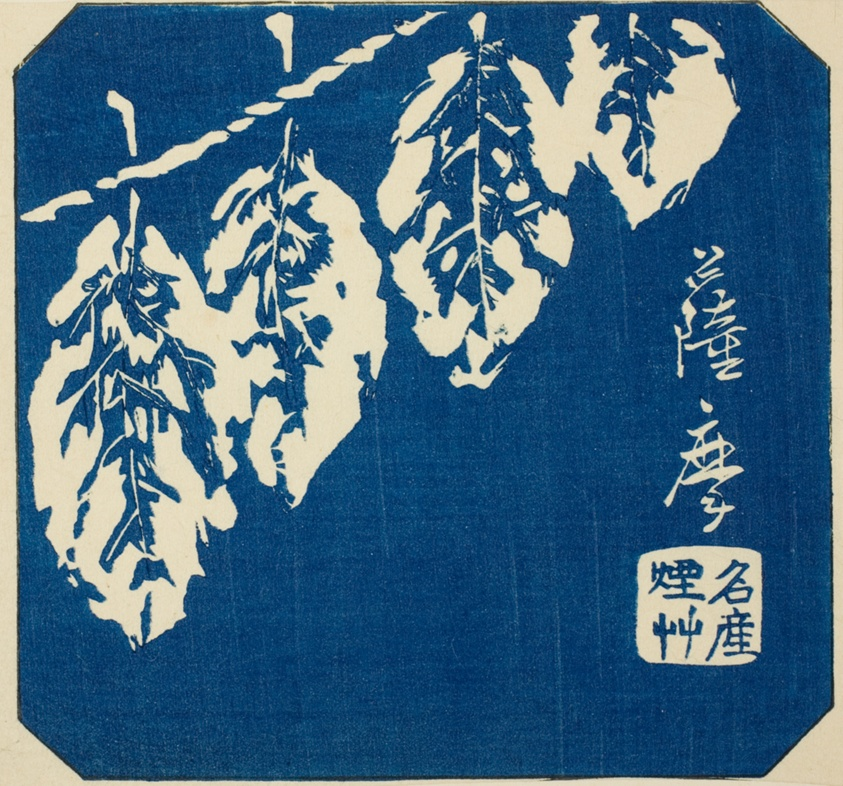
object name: Print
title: Satsuma, section of sheet no. 18 from the series "Cutout Pictures of the Provinces (Kunizukushi harimaze zue)"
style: Japanese (culture or style)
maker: Utagawa Hiroshige 歌川 広重; Japanese, 1797-1858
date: 1852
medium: Color woodblock print; section of harimaze sheet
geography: Japan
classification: woodblock print; print; asian art